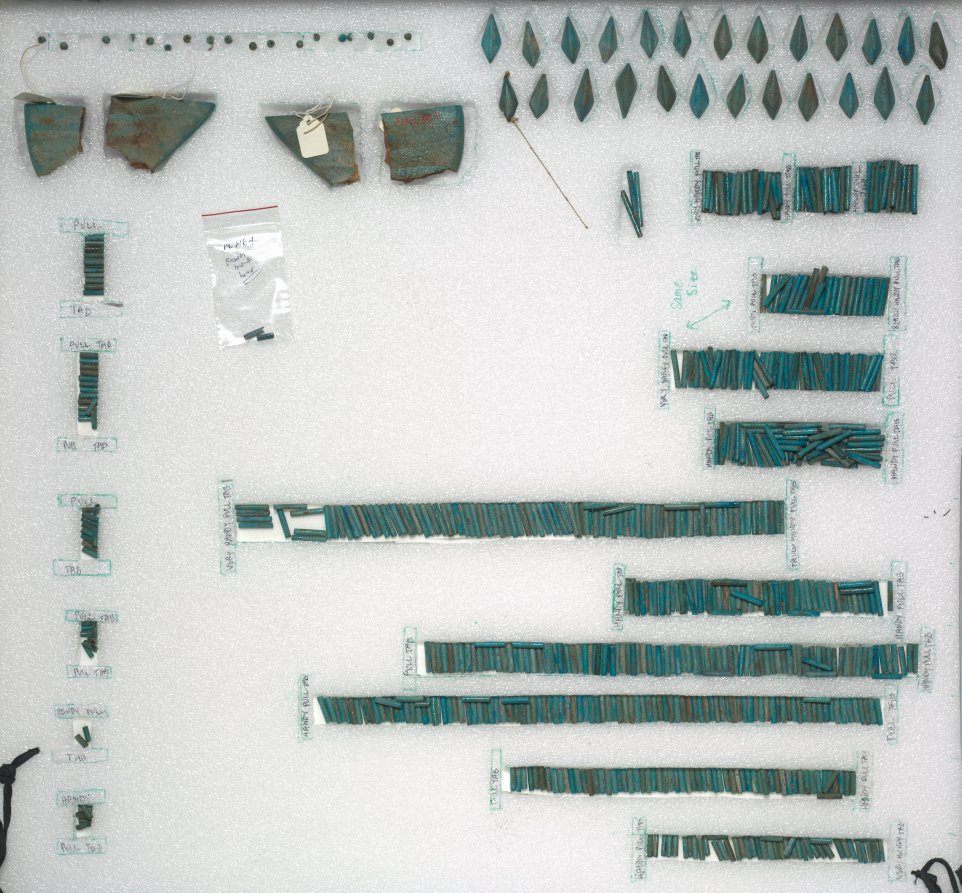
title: Jewelry of Senbi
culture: Egypt, Middle Kingdom (2040–1648 BCE)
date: 1980–1801 BCE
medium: blue-to-turquoise faience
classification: Jewelry